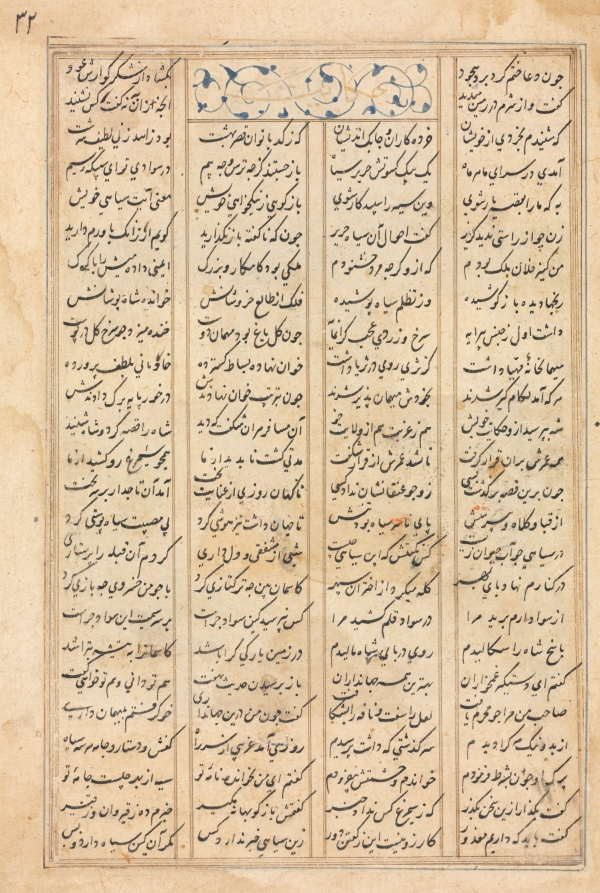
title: Text Page, Persian Verses (verso) Bahram Gur Visits the Princess of India: from a manuscript of the Khamsa of Nizami, Haft Paykar [Seven Portraits]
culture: Iran, possibly Tabriz or Shiraz, Timurid Period, early 15th century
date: c. 1400–1410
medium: ink and opaque watercolor on paper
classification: Manuscript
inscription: script: Nasta'liq